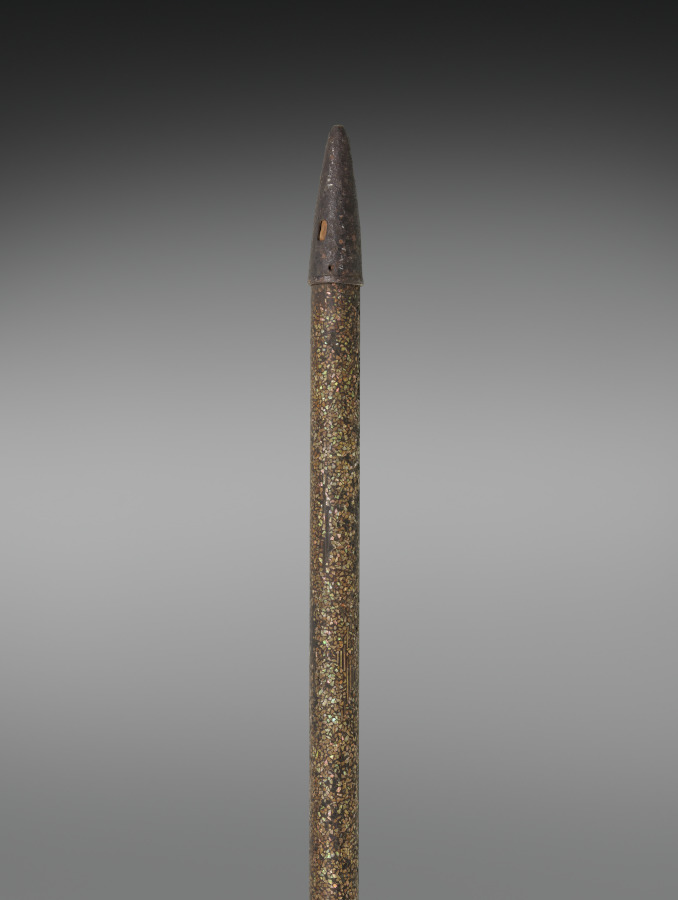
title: Spear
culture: Japan, Edo period (1615–1868)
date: 1700s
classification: Arms and Armor